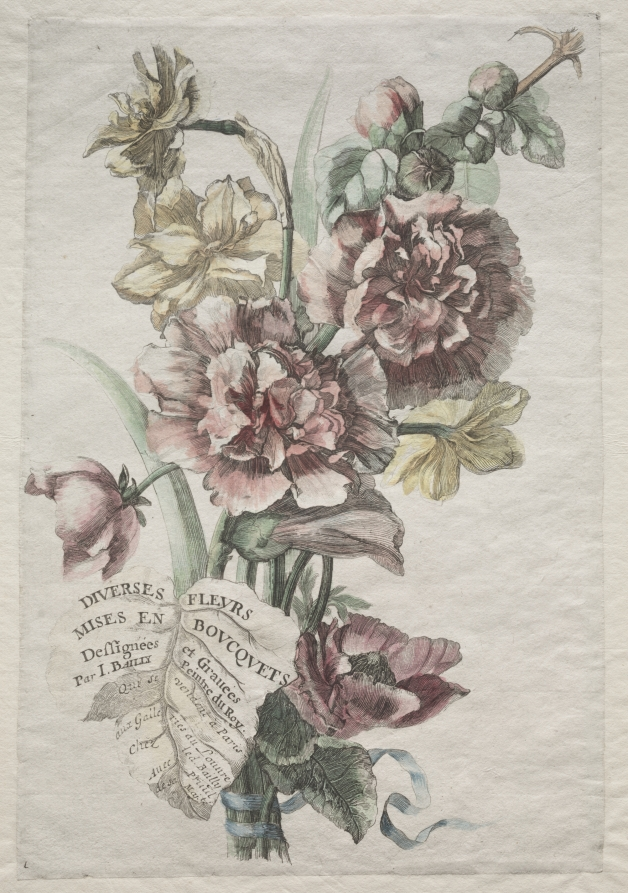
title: Divers fleurs mises en boucquets: No. 1 - Hollyhocks and Narcissus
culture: France, 17th century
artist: Jacques I Bailly (French, 1634–1679)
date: c. 1670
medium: etching and engraving, hand colored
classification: Print